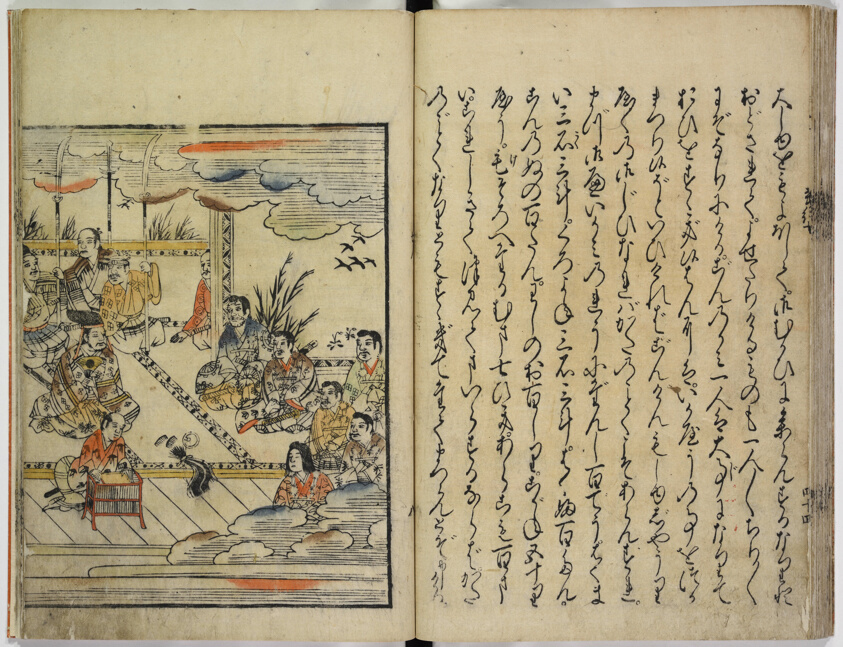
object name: Book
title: Record of Yoshitsune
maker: Artist unknown, Japanese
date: 1635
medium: Woodblock-printed book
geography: Japan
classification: book